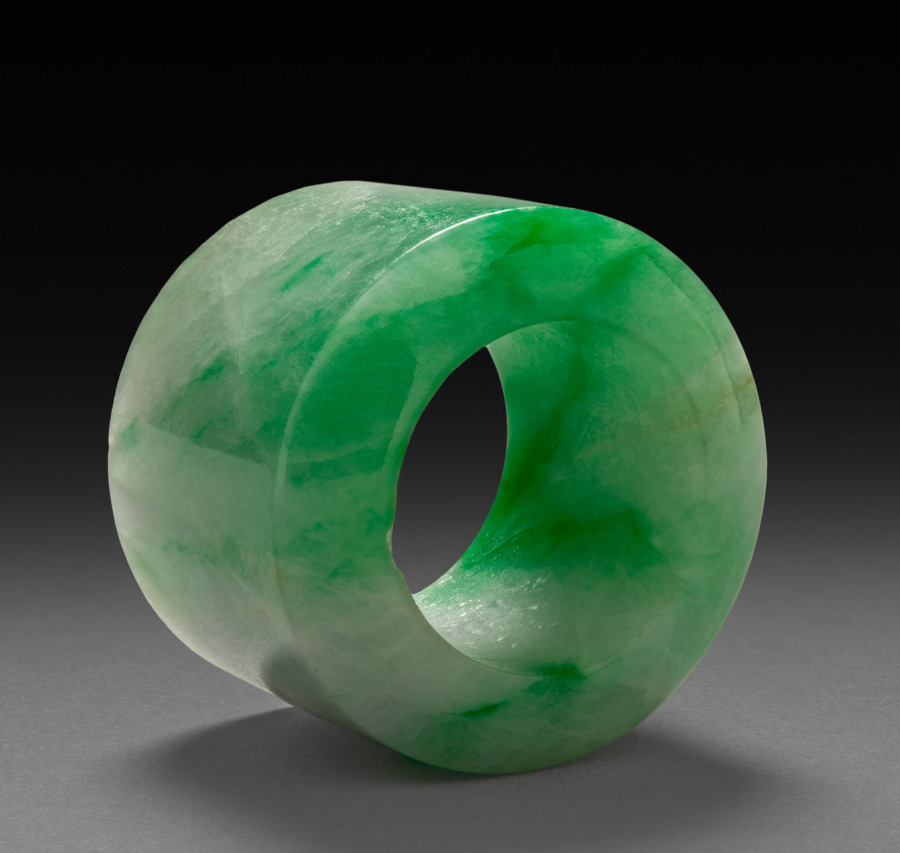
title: Thumb Ring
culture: China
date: 1800s–1900s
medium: green and white jade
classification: Jewelry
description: Jade rings were worn by men on the thumb of the right hand to assist with holding and pulling the string of the archer’s bow. However, thumb rings were also fashionable accessories for civil officials in the late Qing dynasty.